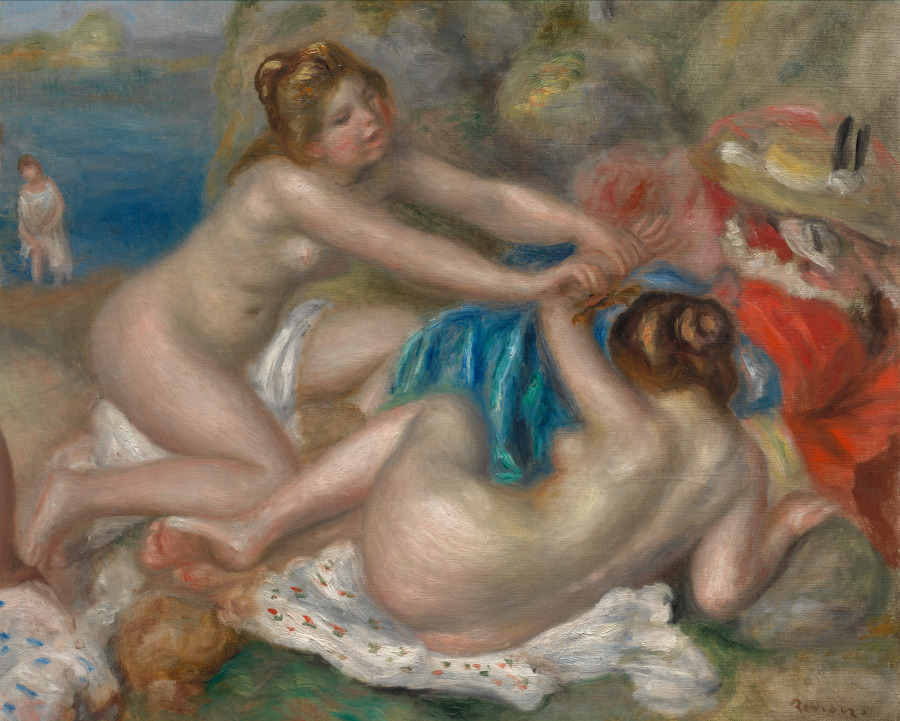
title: Bathers Playing with a Crab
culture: France, 19th century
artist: Pierre-Auguste Renoir (French, 1841–1919)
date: c. 1897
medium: oil on fabric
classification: Painting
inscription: Signed lower right: Renoir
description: After viewing Renaissance paintings on a trip to Italy in 1881, Renoir attempted to bring greater order and stability to Impressionism by merging flickering light effects with solid forms. He conveyed this new ambition in a series of paintings of nude bathers, a subject that preoccupied him from 1883 until his death in 1919. Avant-garde artists of the 20th century admired his ability to blend modernist and classicizing tendencies.